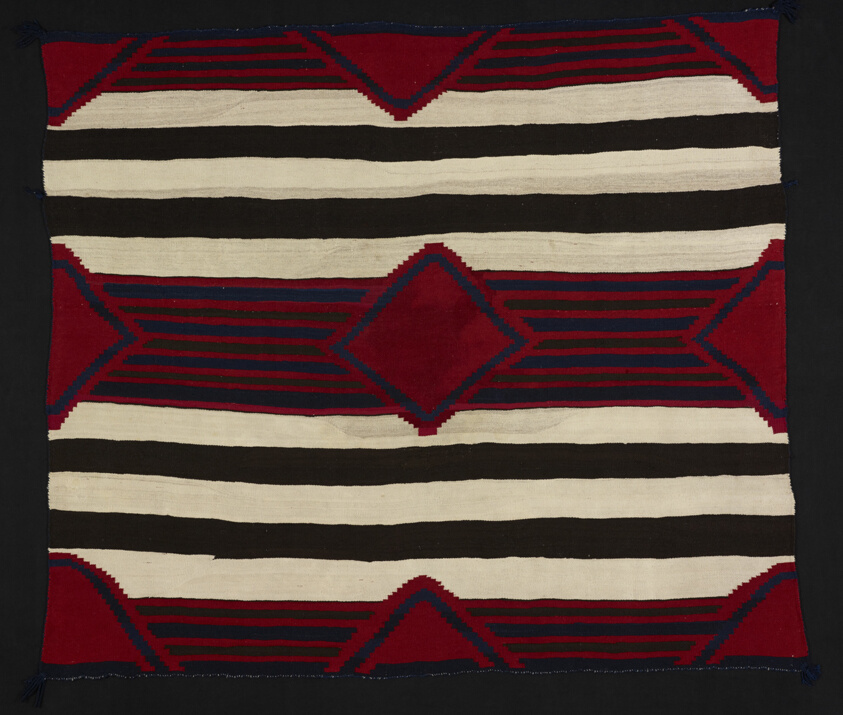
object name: Costume and Accessories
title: Chief Blanket (Third Phase)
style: navajo, native american, americas, native north american, indigenous, north american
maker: Navajo (Diné) (Arizona, New Mexico, and Utah, United States)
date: c. 1860/65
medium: Wool, single interlocking tapestry weave; twined edges; corner tassels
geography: Navajo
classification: textile; weaving; costume